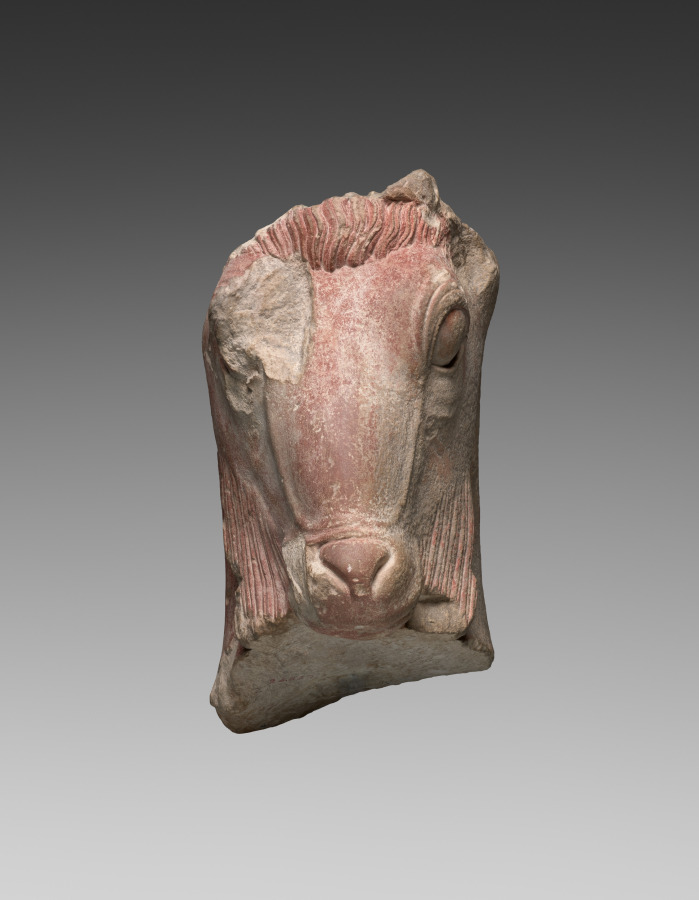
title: Fragment of a Goat's Head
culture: Greece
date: c. 500–475 BCE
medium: limestone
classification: Sculpture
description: Initially identified as a horse head, this fragmentary sculpture, once painted reddish-brown, has a beard, indicating that it depicts a goat. Its large size, however, together with its neck position and unusual round eye, have all prompted questions. Was the head broken from a rearing goat? Or did it represent Pan, the rustic shepherd god often depicted as half-man, half-goat? If Pan, some scholars have connected it with a fifth-century BC Athenian sanctuary erected to thank the god for aid in battle. An alleged provenance near the Athenian Acropolis supported this idea, but scientific tests suggest otherwise.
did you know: Pan, the goat-headed god, is often called a son of Hermes, but sources disagree.